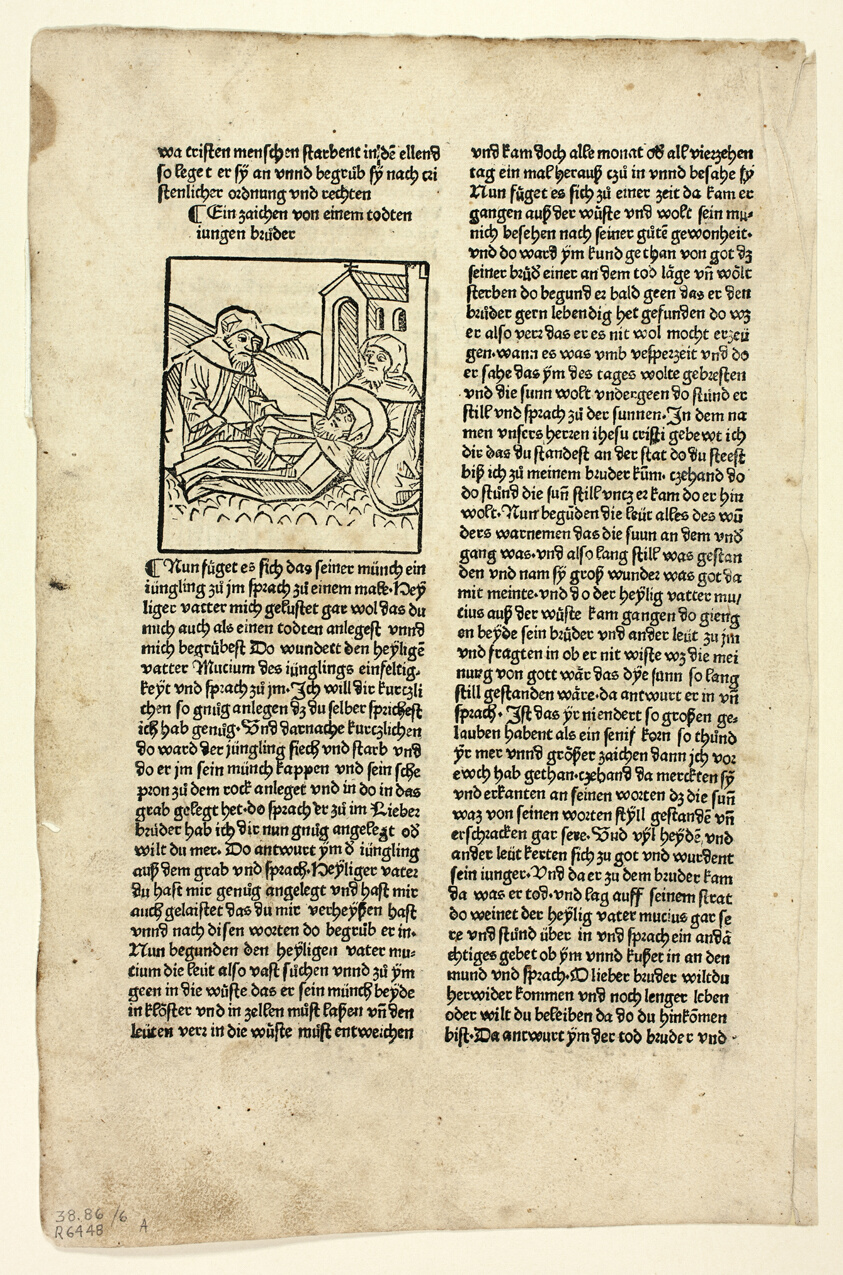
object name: Print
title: A Token from a Dead Young Brother (recto) and Father Mucius in His Cell (verso) from Altvaeterleben (Life of the Patriarchs), Plate 6 from Woodcuts from Books of the 15th Century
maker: Unknown Artist (Augsburg, 15th century); printed and published by Peter Berger (German, active 1486–1489); original text by Saint Jerome (Dalmatia, c. 347–420); portfolio text by Wilhelm Ludwig Schreiber (German, 1855–1932)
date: 1488, portfolio assembled 1929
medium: Woodcut and letterpress in black (recto and verso) on buff laid paper, tipped onto cream wove paper mat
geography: Germany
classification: woodcut; print; prints and drawing